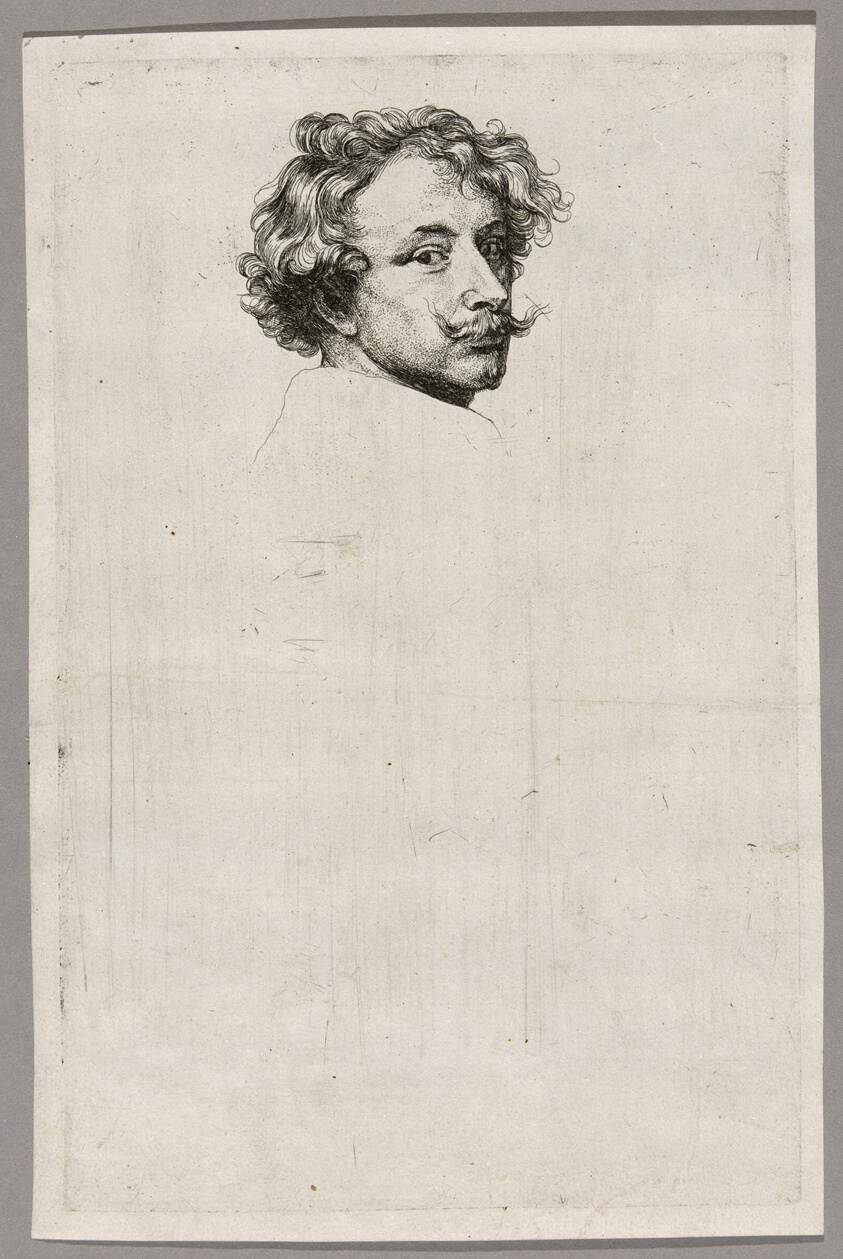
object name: Print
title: Self-Portrait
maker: Anthony van Dyck (Flemish, 1599-1641)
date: 1630/33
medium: Etching in black on ivory laid paper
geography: Flanders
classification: etching; print; prints and drawing